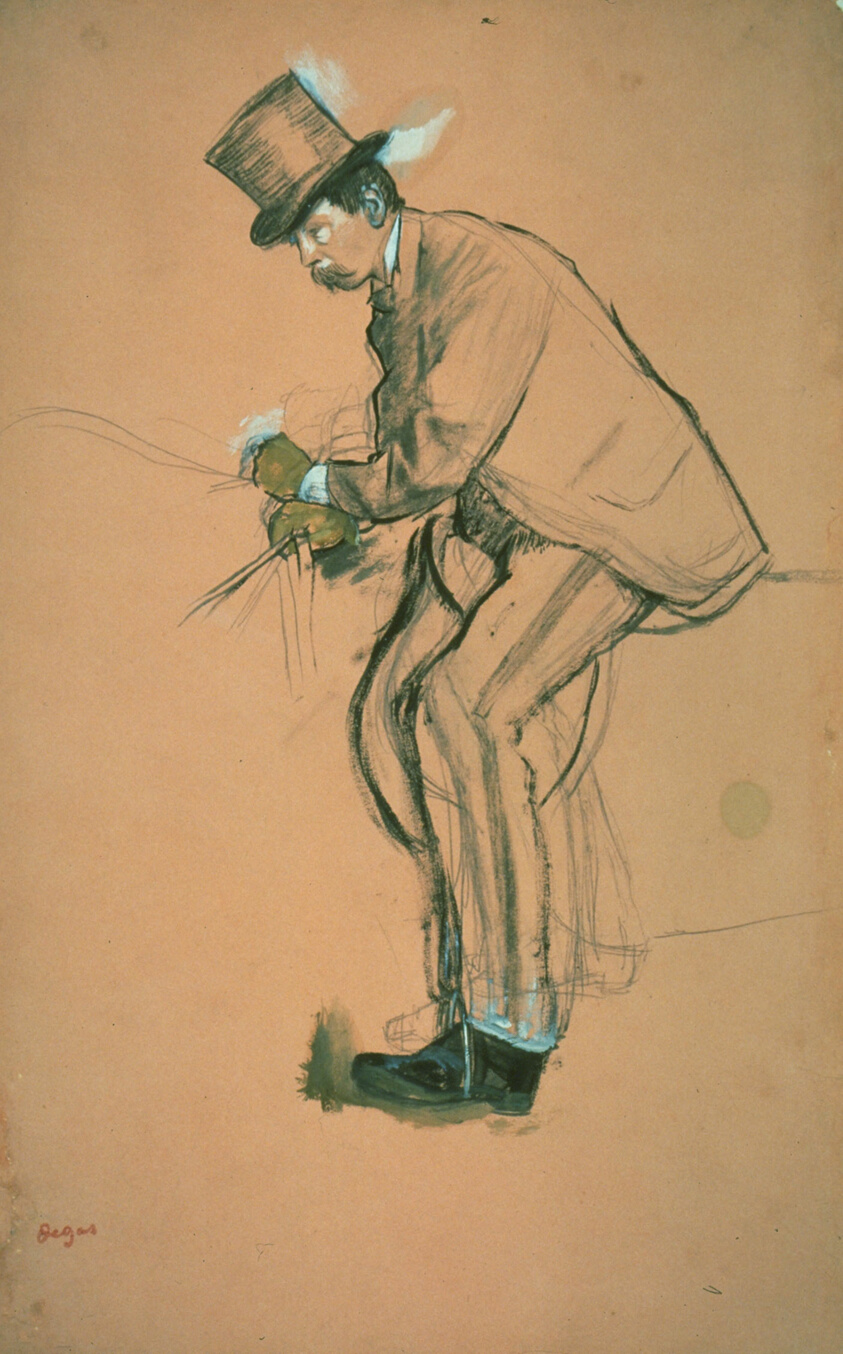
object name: Drawing and Watercolor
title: Gentleman Rider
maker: Edgar Degas; French, 1834-1917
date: 1866/70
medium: Brush and black gouache, with touches of white and brown oil paint, over graphite, on pink wove paper, laid down on cream board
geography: France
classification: pen and ink drawings; drawings (visual works); prints and drawing; paper